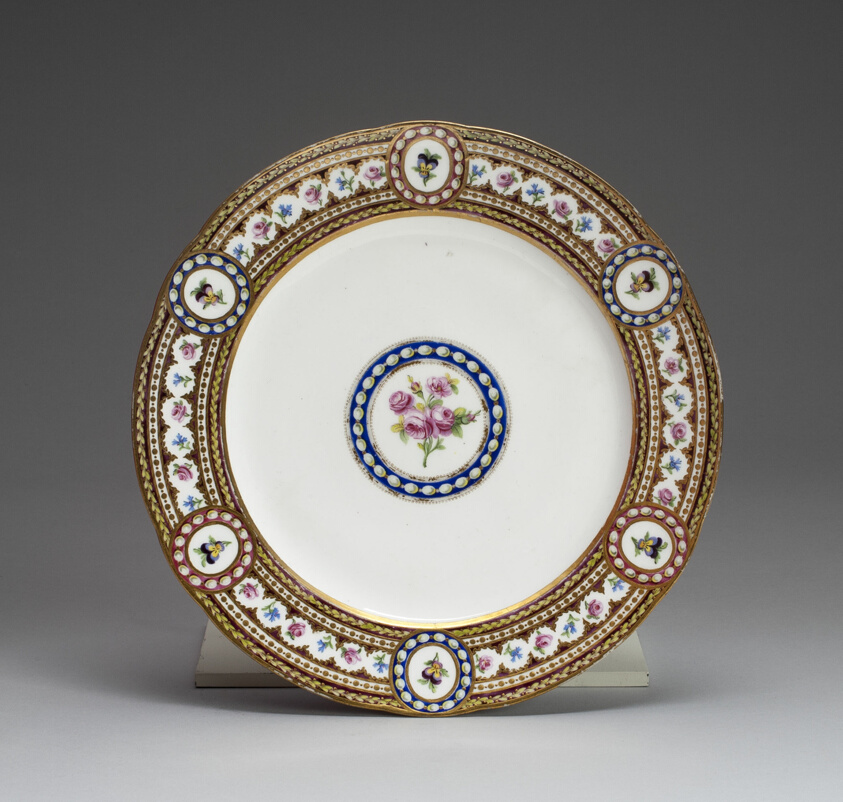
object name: Ceramics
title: Plate from a service ordered by Marie-Antoinette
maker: Sèvres Porcelain Manufactory; French, founded 1740; Painted by Charles-Nicolas Buteux (French, active 1763–1801); Gilded by André-Joseph La France (French, active 1776–1801, 1813–28)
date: 1784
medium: Soft-paste porcelain, polychrome enamels, and gilding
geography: Sèvres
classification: plate (general, dish); tableware; dish (vessel); ceramics; porcelain; european decorative arts